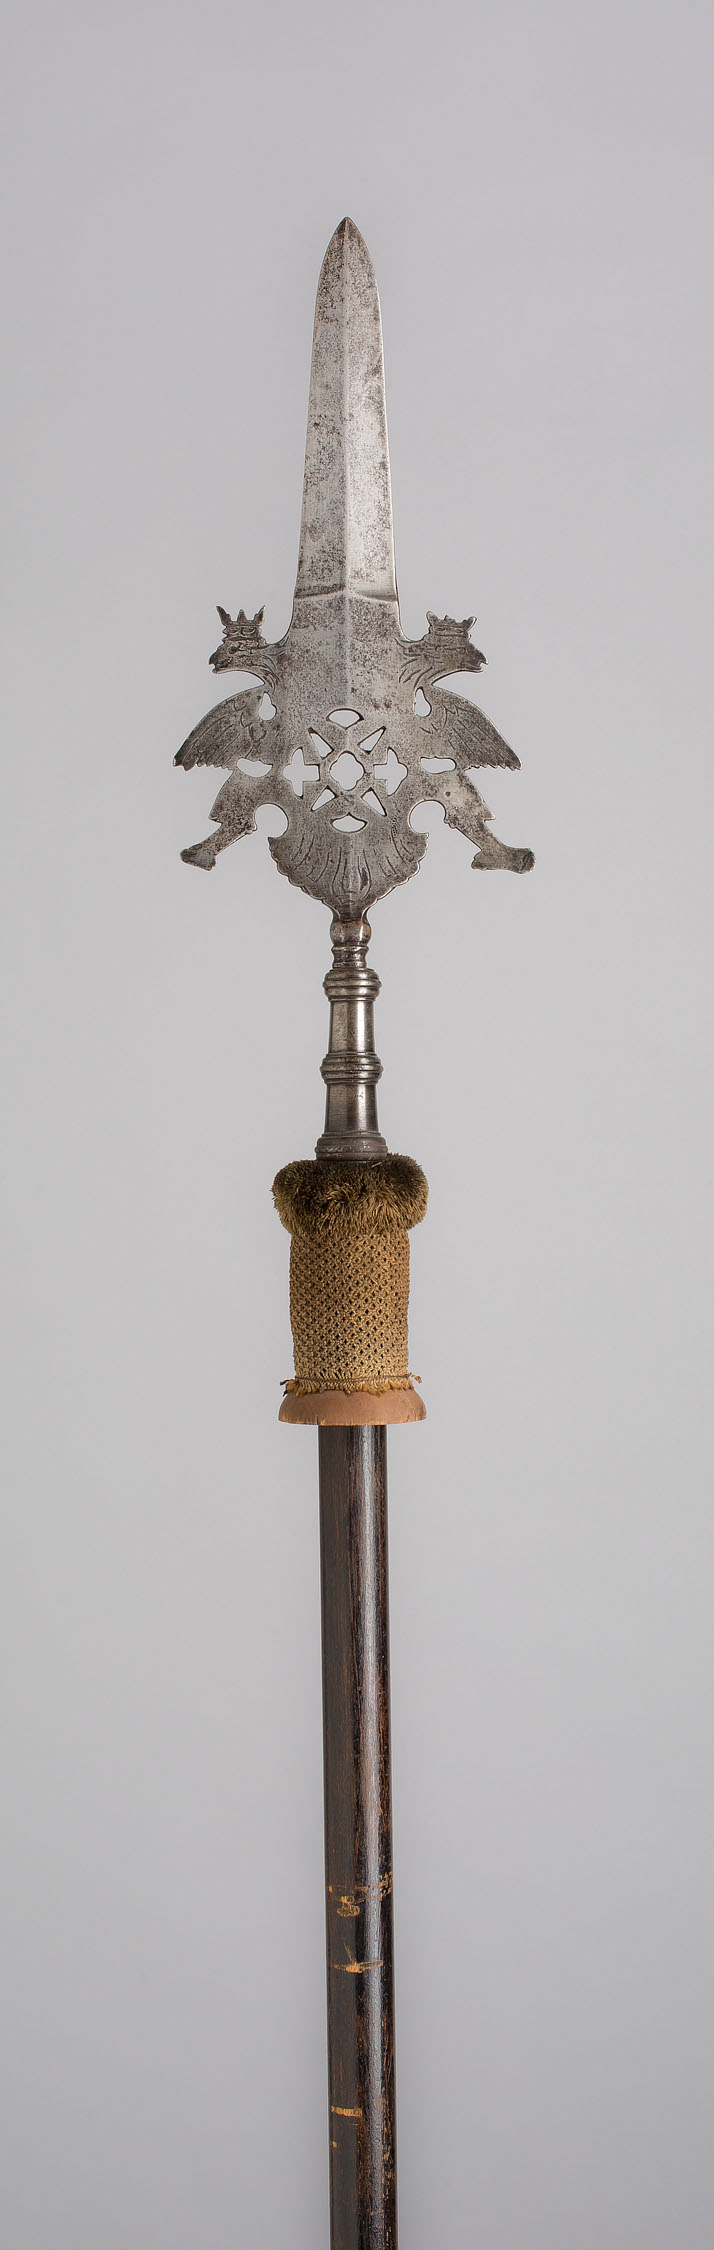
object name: Arms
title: Partizan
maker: German, Saxony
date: 18th century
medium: Steel, wood (red oak), and thread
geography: Saxony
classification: edged weapon-staff; arms; arms and armor